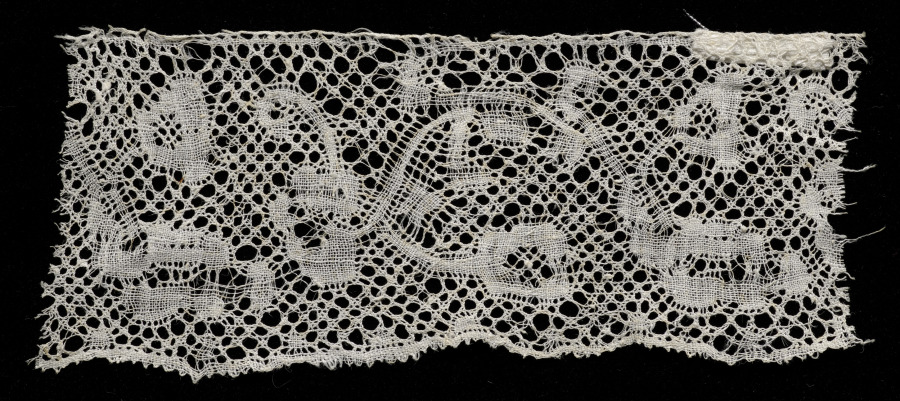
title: Lace Edging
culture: Spain, Terez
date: 1700s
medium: Bobbin lace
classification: Lace